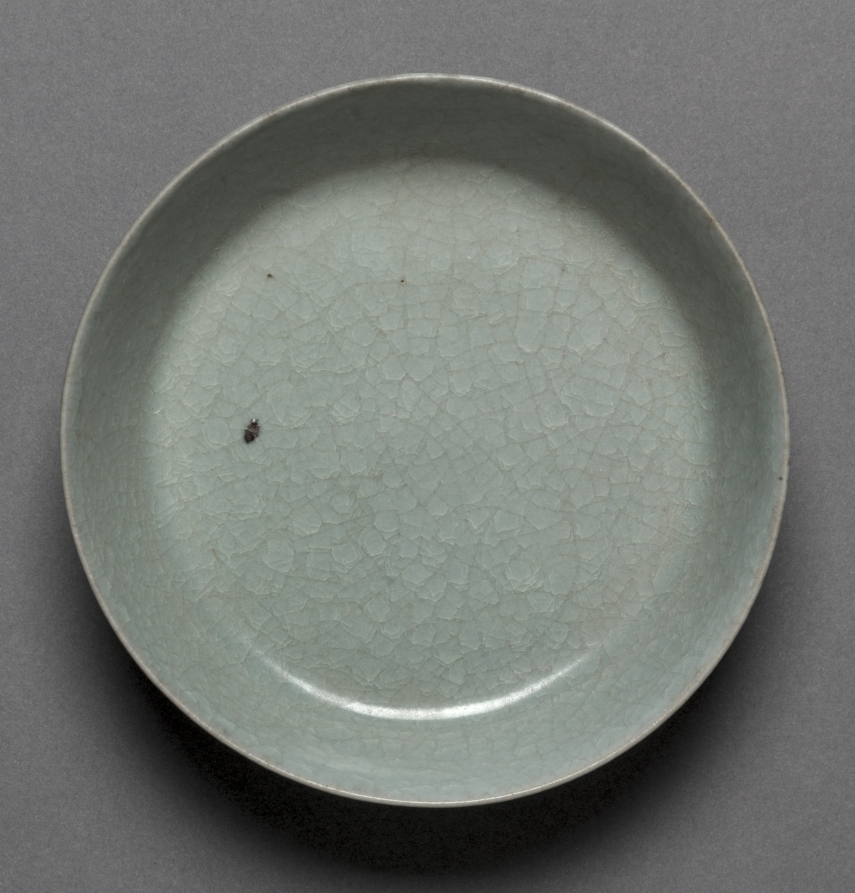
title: Brush Washer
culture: China, Henan Province, Baofeng, Qingliangsi, Northern Song dynasty (960-1127)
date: late 1000s–1127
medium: porcelaneous stoneware, Ru ware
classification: Ceramic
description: Ru ware is the rarest and most celebrated of all Chinese imperial wares. It was made for the late Northern Song court for a very short time and was therefore extremely rare and precious. Simplicity and refined elegance are Ru ware's hallmarks. Its graceful shape, soft luster, and subtle color variation of the glaze interact in perfect unity. Other physical characteristics include an ash-grey body, soft greyblue glaze with a fine crackle, as well as small sesame-seed spur marks on the base.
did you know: The little black spot in the glaze inside the dish is one of the slight imperfections characteristic of genuine Ru ware.